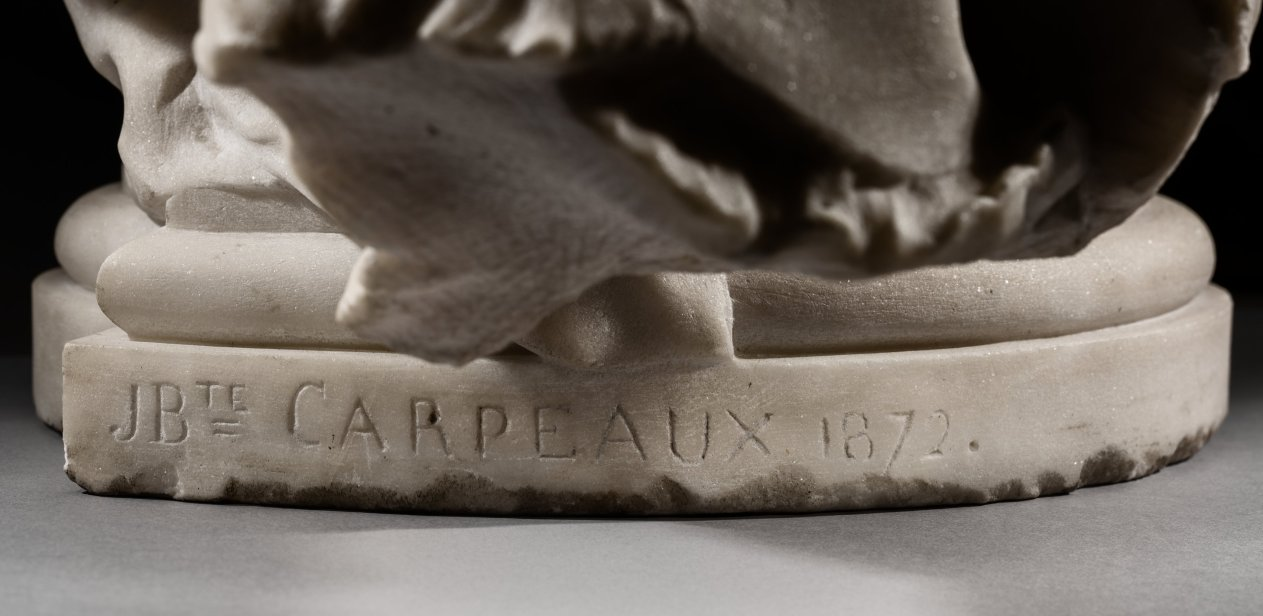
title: Bust of a Lady (possibly Fanny Coleman)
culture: France, 19th century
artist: Jean-Baptiste Carpeaux (French, 1827–1875)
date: 1872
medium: marble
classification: Sculpture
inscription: inscribed on base: J. Bte CARPEAUX 1872.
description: Abandoning the strict frontality and symmetry of the neoclassical style, Carpeaux was instead inspired by French portrait busts of the 1600s and 1700s. This bust probably depicts Fanny Coleman, an English actress with whom Carpeaux may have had a romantic relationship. The turn of the head and the undulating drapery infuse the figure with a sense of drama. Patronized by Napoleon III, Carpeaux created the celebrated figural group La Danse for the facade of the Opera Garnier in Paris, a work renowned for its sensual nudes, but denounced by contemporaries as an affront to public decency.